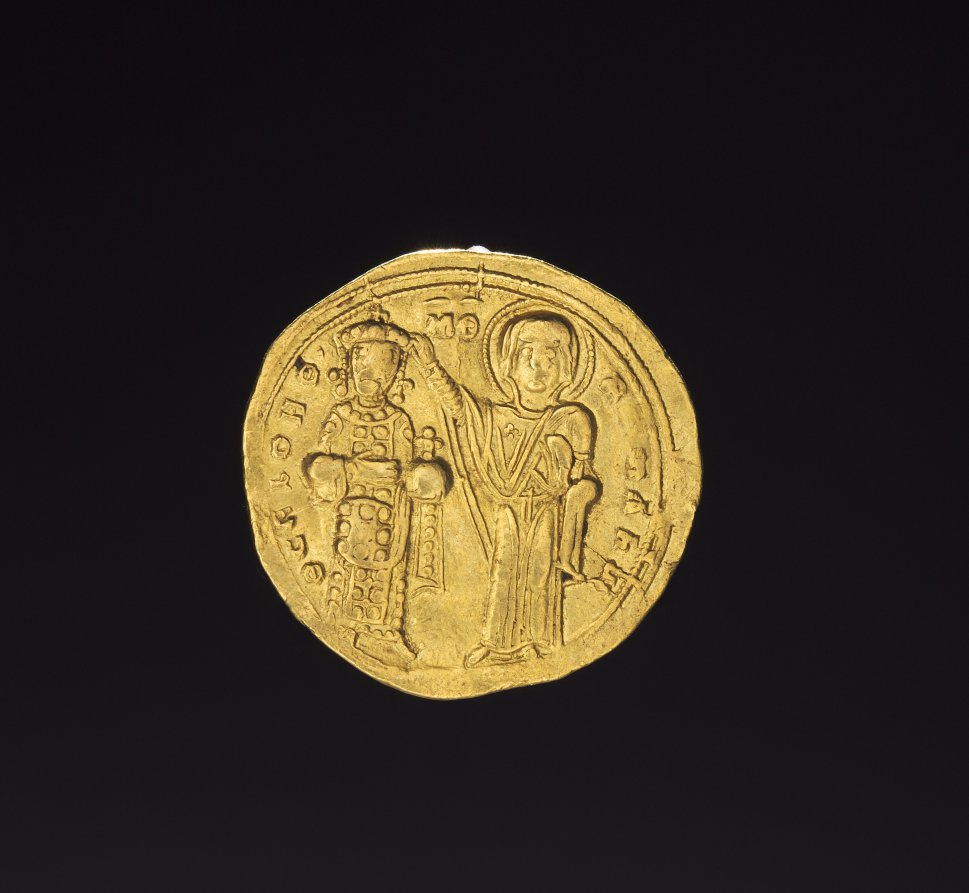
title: Histamenon of Romanus III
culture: Byzantium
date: 1028–1034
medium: gold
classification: Coins